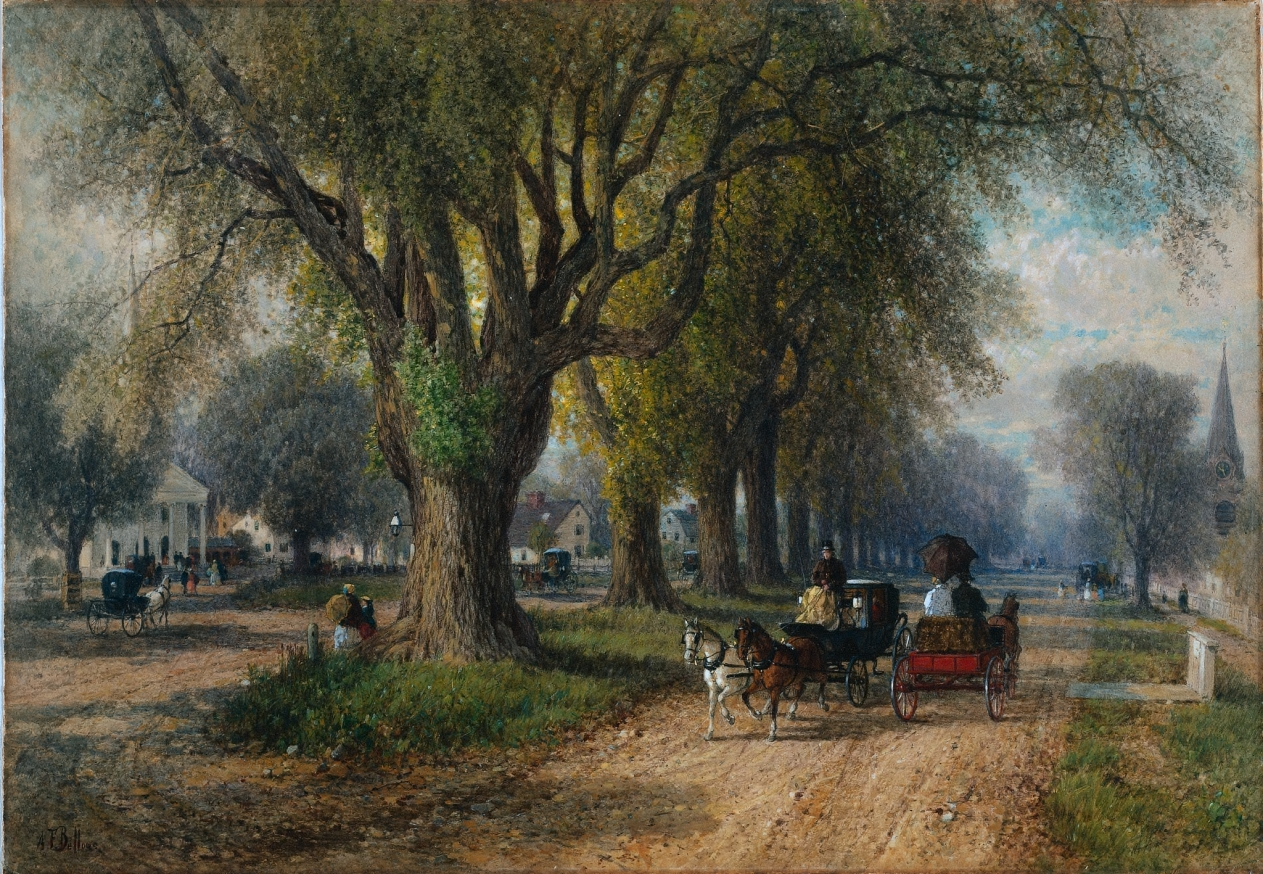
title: Sunday in New England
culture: America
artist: Albert Fitch Bellows (American, 1829–1883)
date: c. 1876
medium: watercolor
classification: Drawing